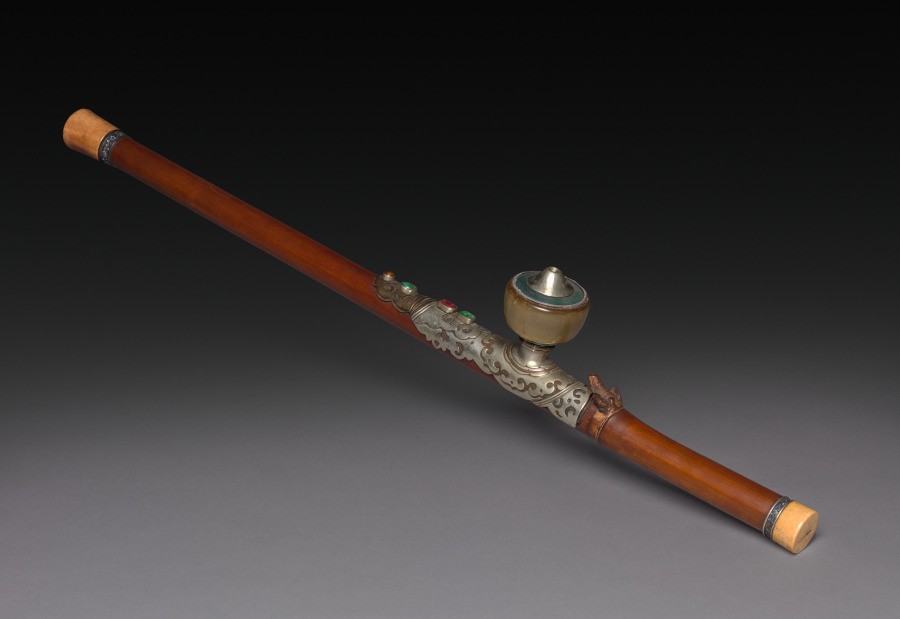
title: Opium Pipe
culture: China, Qing dynasty (1644-1911)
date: 1800s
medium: wood, ivory and silver and enamel ferrules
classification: Miscellaneous